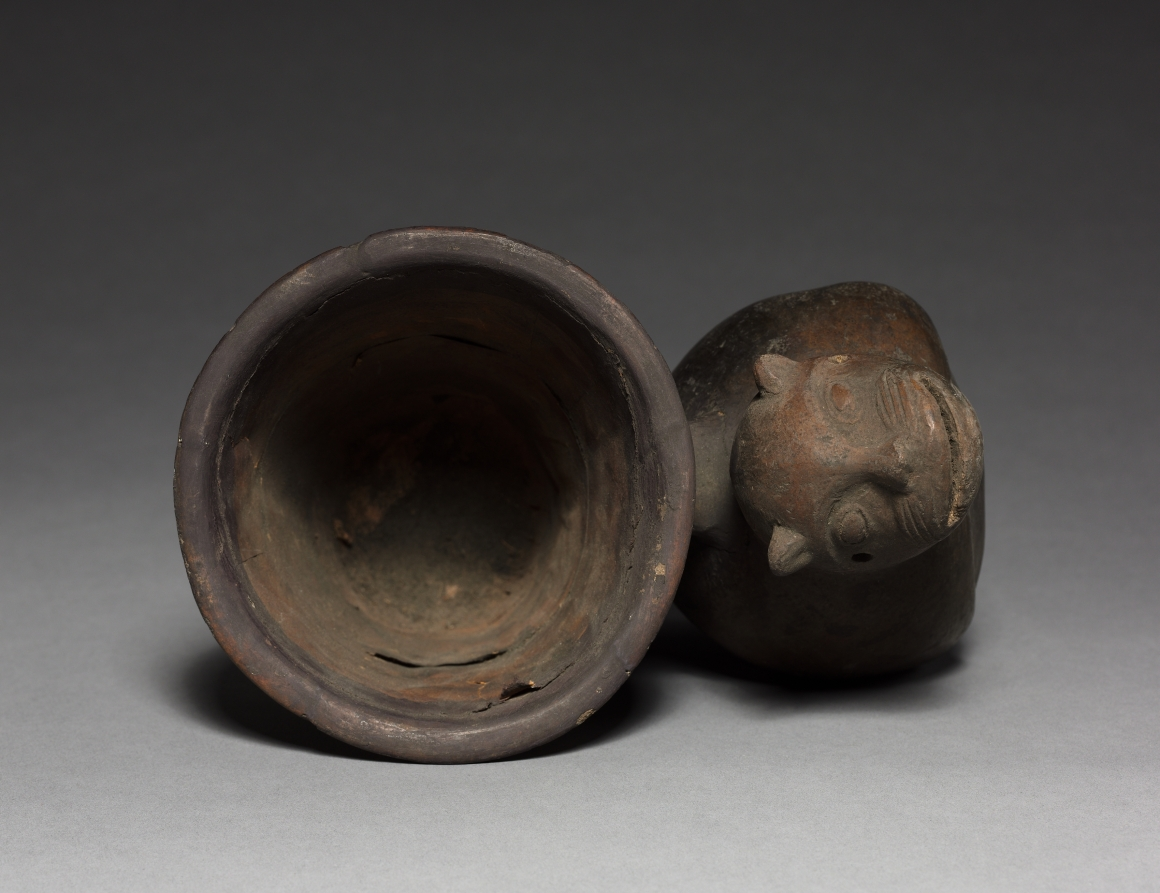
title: Vase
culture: Peru, Huacho Ware?, early 9th Century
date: c. 800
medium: black ware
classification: Ceramic